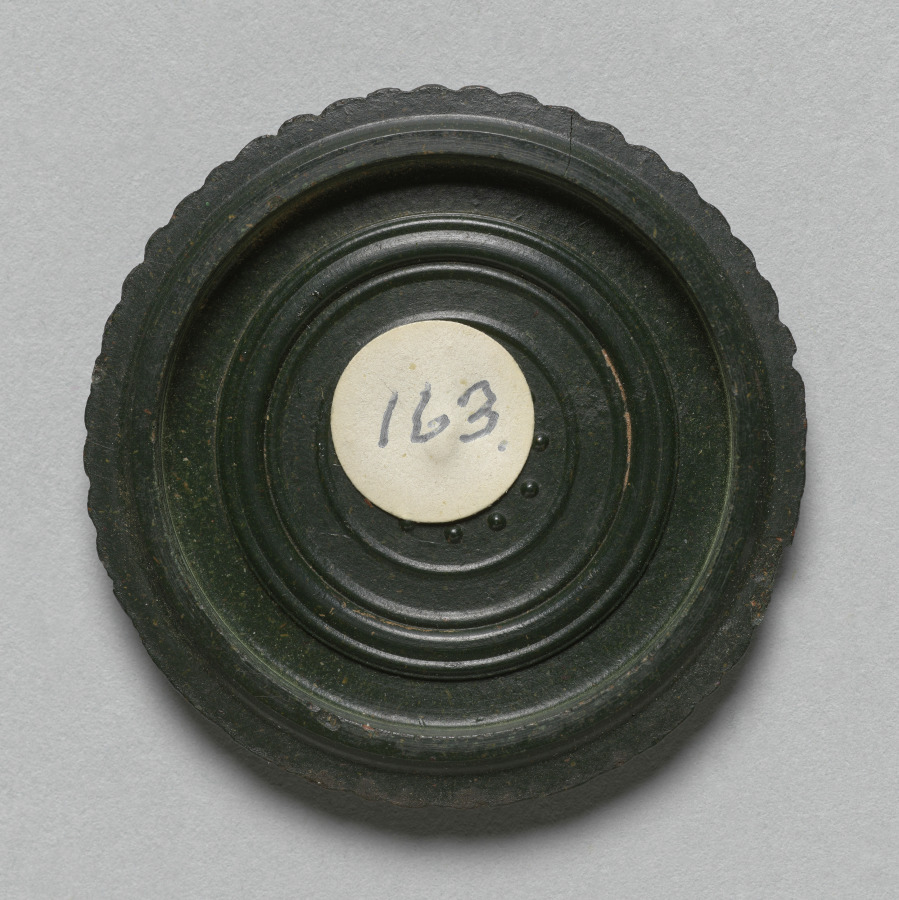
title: Portrait of a Young Woman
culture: America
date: c. 1855–60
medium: Tintype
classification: Photograph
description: It seemed a miracle that anyone could afford to have an accurate record of their own likeness or those of their loved ones. This portrait is an excellent example of the hundreds of thousands of portraits produced by commercial photographers in mid-nineteenth-century America. Small scale yet housed in an elaborately decorated thermoplastic case, it was intended to be carried by its owner or displayed on parlor tables or knickknack shelves.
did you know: During the first decades of photography, portraits far outnumbered every other type of image.